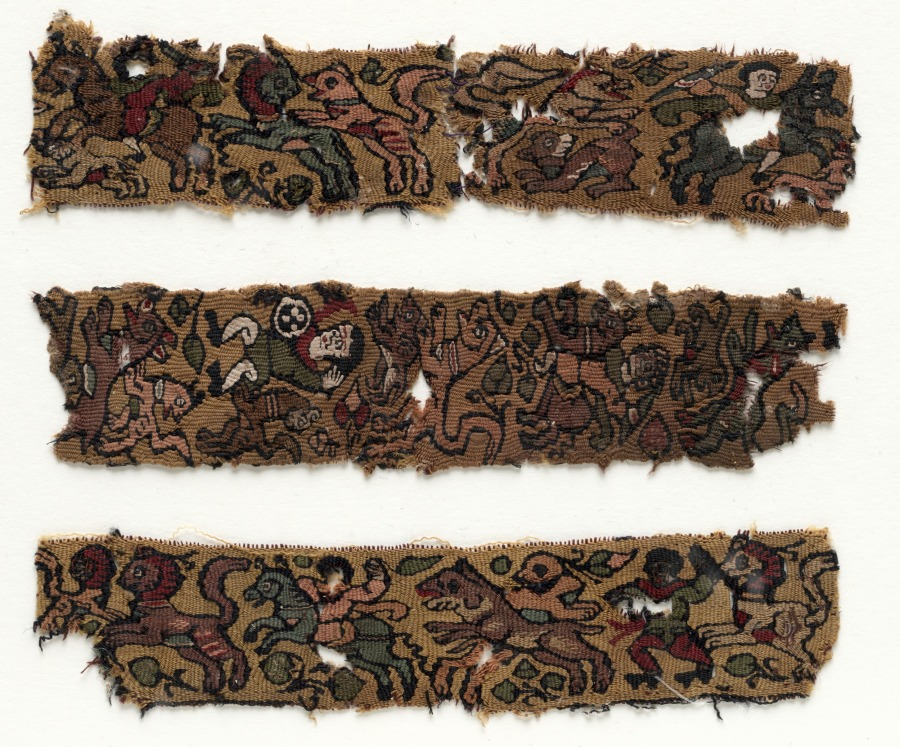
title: Three Fragments from a Border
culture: Egypt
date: before 1968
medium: tapestry weave; wool and linen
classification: Textile